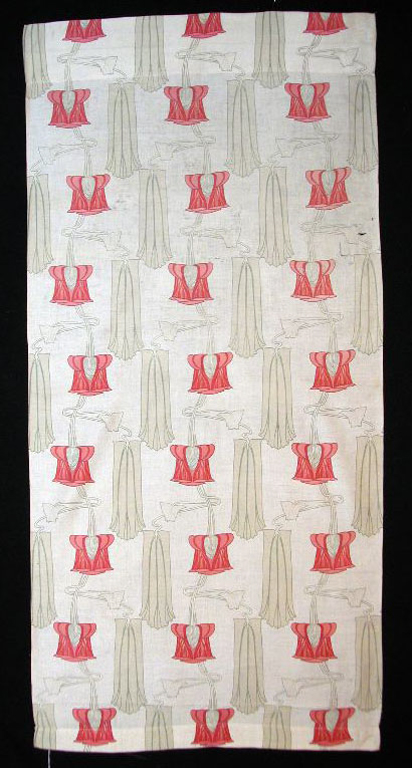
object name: Textile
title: Panel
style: Art Nouveau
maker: England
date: c. 1900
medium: Cotton, satin weave; block printed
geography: England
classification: textile; weaving - printed